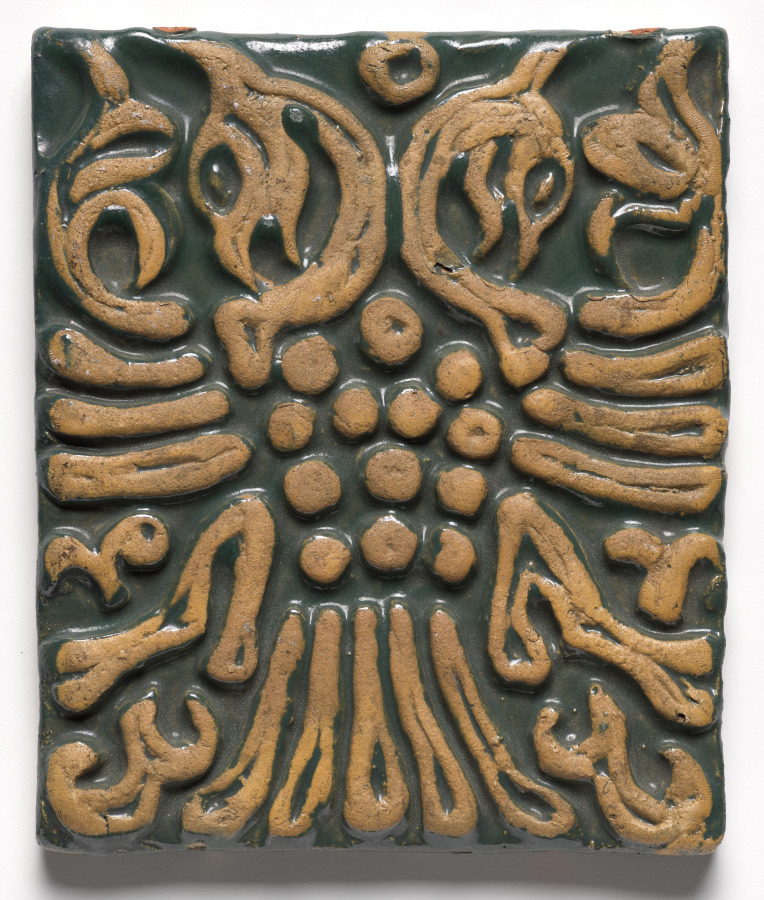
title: Tile- Double-Headed Eagle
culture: America, Pennsylvania, Doylestown, Early 20th century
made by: Moravian Pottery and Tile Works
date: before 1921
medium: glazed ceramic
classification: Ceramic